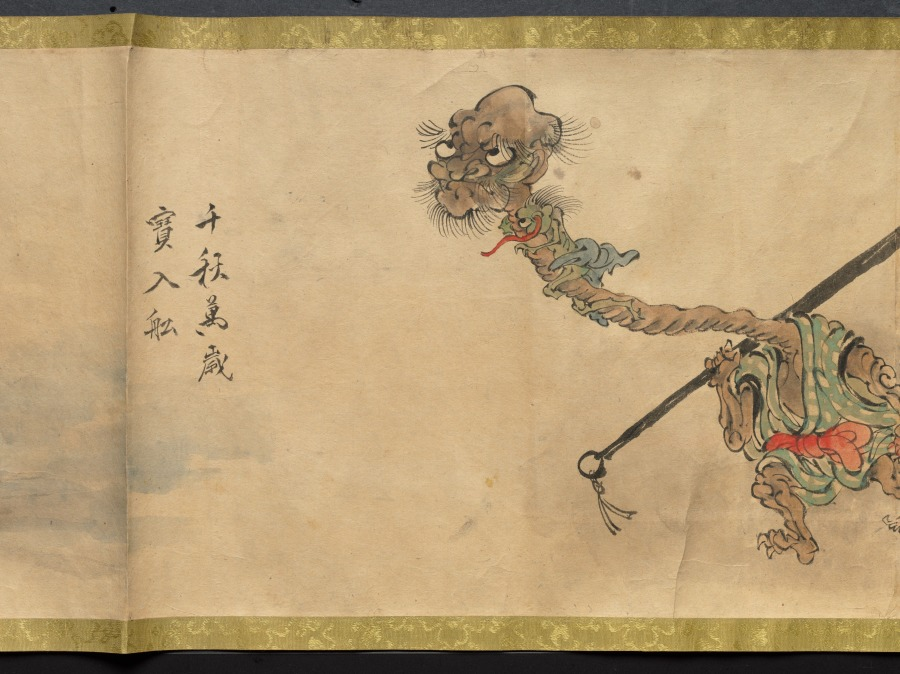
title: An Illustrated Marriage of Apparitions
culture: Japan, Edo period (1615–1868)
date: mid-1800s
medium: handscroll; ink and color on paper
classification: Painting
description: The matchmaking, engagement, wedding, and birth of the first child of two apparitions, or bakemono, literally "things that change," are illustrated in this whimsical, humorous handscroll. Japanese folklore abounds with such strange creatures, most famously represented in handscrolls featuring a procession of 100 supernatural monsters. Aside from a textual preface and cartouches indicating the content of the scenes, the tale is told visually. The artist and whereabouts of the original handscroll are unknown, but a number of other 19th-century copies by amateur painters exist in Japanese collections, attesting to its broad appeal.